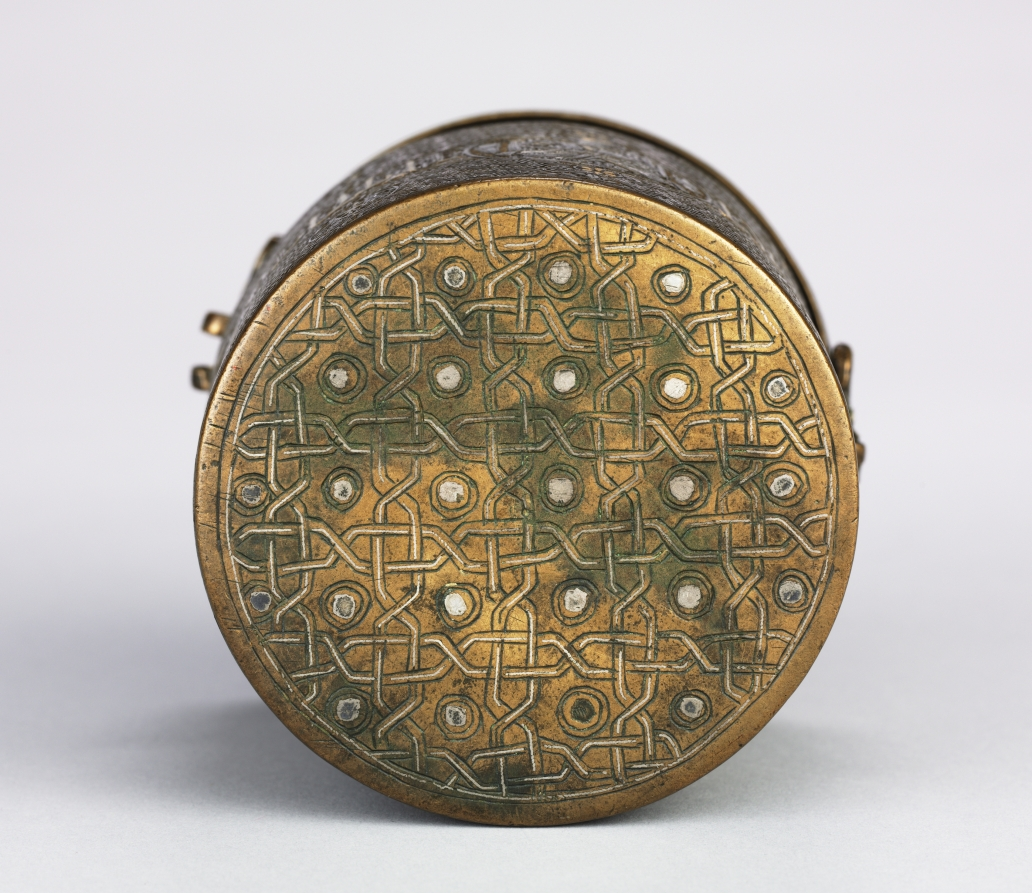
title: Luxury Inlaid Container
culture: Northern Iraq, Ayyubid period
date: c. 1250–1350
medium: sheet brass, inlaid with silver and gold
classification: Metalwork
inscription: Band around body (naskh): "Lasting glory, and safe life, and increasing prosperity, [and] nobility, [and] effective authority"; band around body (naskh): "Brilliance, and nobility, and patience, and modesty, and glory, and long life, and piety, and patience"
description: Metalwork flourished in the 1200s with production centers in Mosul, Damascus, and eastern Anatolia. Along with this container, the nearby ewer and candlestick are examples of the superb pieces produced at this time. Scenes of court life, including banqueting, music, and enthroned figures, decorate the sides and top of the container. The lid is covered in hexagonal swastikas, an ancient solar motif, which is further enhanced by a large sunburst in the center. The calligraphic inscriptions extend wishes for a long life, prosperity, and patience to the owner.